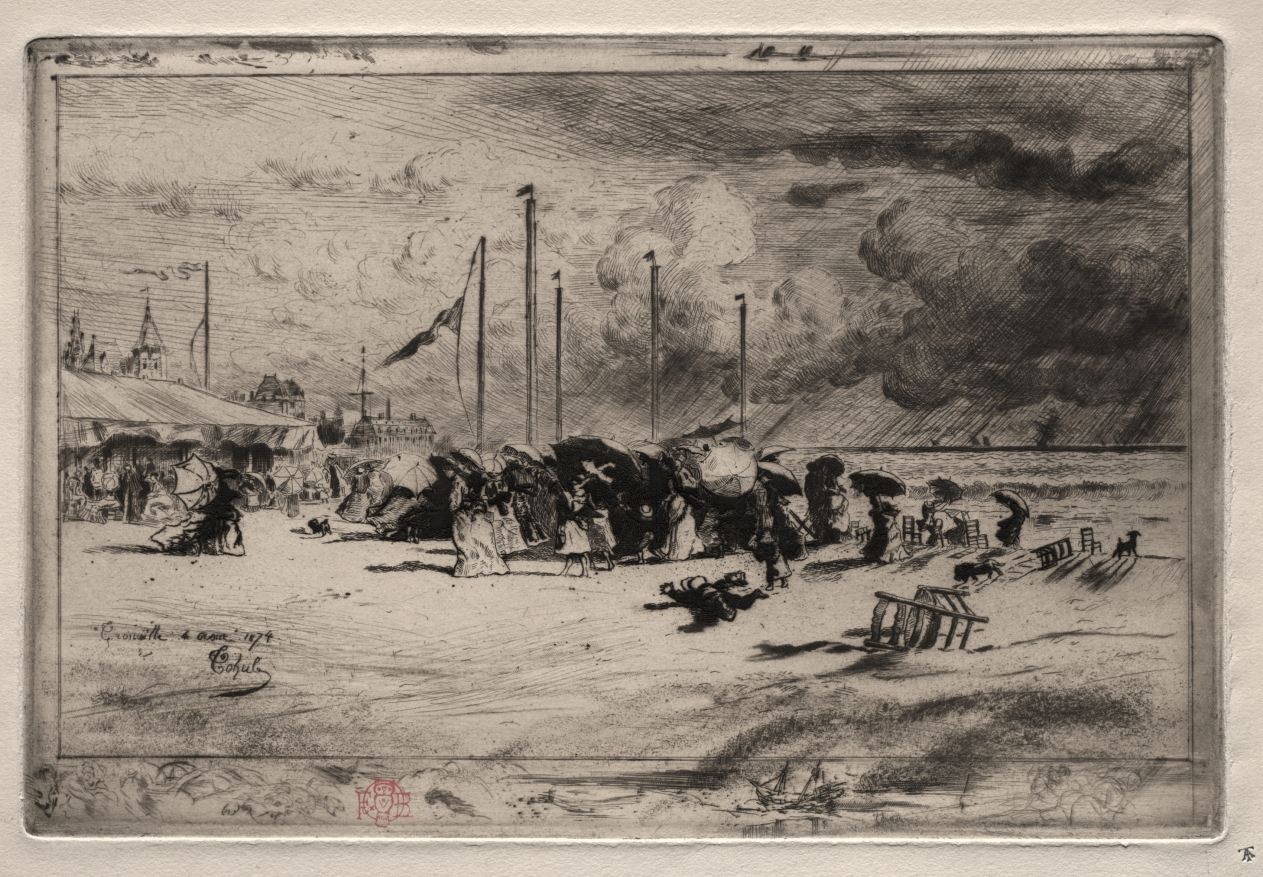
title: A Squall at Trouville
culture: France, 19th century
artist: Félix Hilaire Buhot (French, 1847–1898)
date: 1874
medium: etching, aquatint, roulette and drypoint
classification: Print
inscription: lower left, in plate: "Trouville 4 août 1874 Tohub"